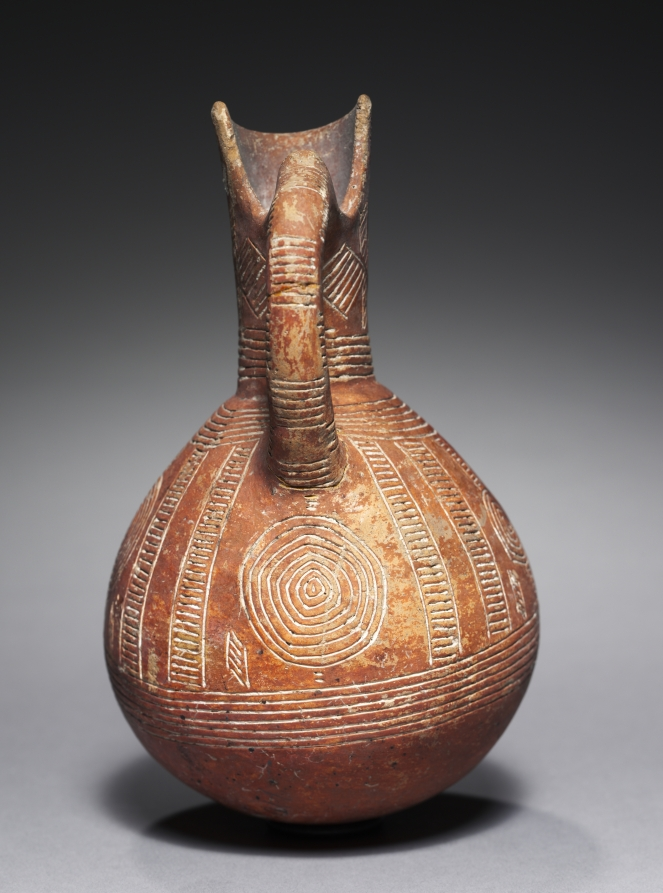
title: Jug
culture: Cyprus, Alambra or Ayia Paraskeve, early Cypriot III-middle Cypriot I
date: c. 2000–1800 BCE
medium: red ware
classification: Ceramic